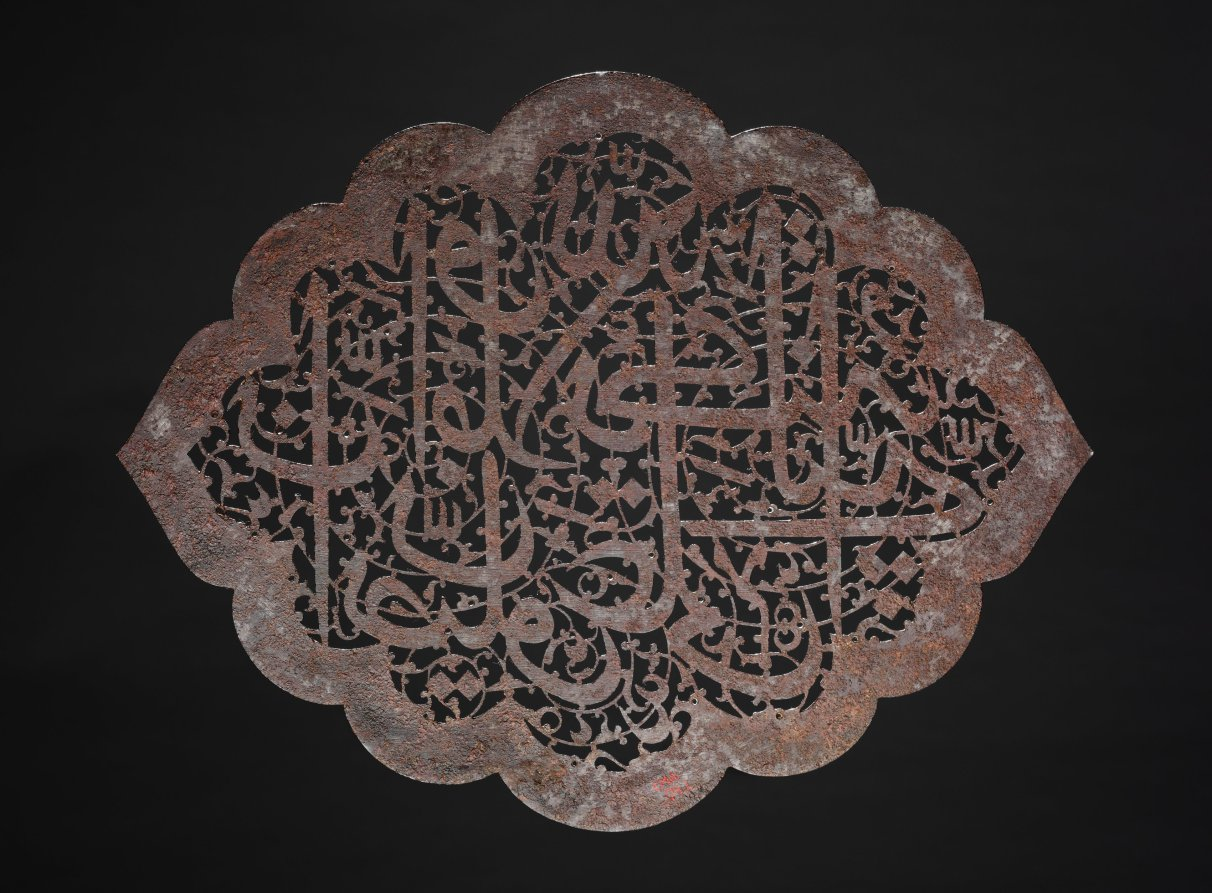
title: Inscription Plaque, Possibly from a Door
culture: Iran, Safavid period (1501–1722)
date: c. 1693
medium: forged steel, cut to shape and pierced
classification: Metalwork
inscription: Muhaqqaq, Qur'an 33:56 'Verily, God and His Angels send blessings on the Prophet'.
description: This pierced steel plaque is said to have adorned the royal tomb of Shah Suleyman II (reigned 1666–93). The Qur’anic inscription reads: “Verily, God and His Angels send blessings on the Prophet” (33:56). Steel plaques of this type required great skill to manufacture. Because of the steel’s tensile strength and durability, artists were able to create elaborate openwork plaques like this one to decorate the doors of mausolea and mosques.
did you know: Calligraphy was the supreme art form in the Islamic world.